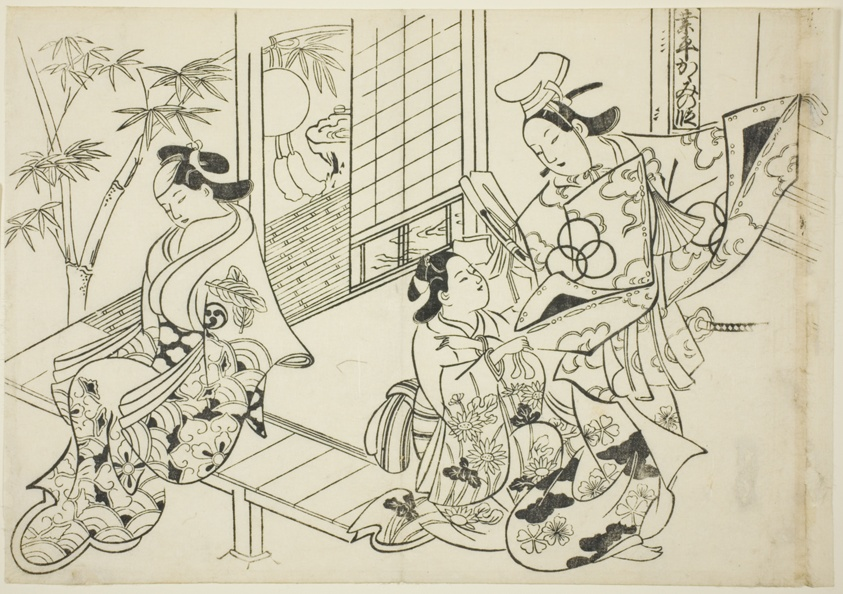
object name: Print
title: Narihira: The Mirror Scene (Narihira kagami no dan), from the series "Famous Scenes from Japanaese Puppet Plays (Yamato irotake)"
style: Japanese (culture or style)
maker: Okumura Masanobu (Japanese, 1686-1764)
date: c. 1705/06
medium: Woodblock print; oban, sumizuri-e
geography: Japan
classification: woodblock print; print; asian art; woodblock